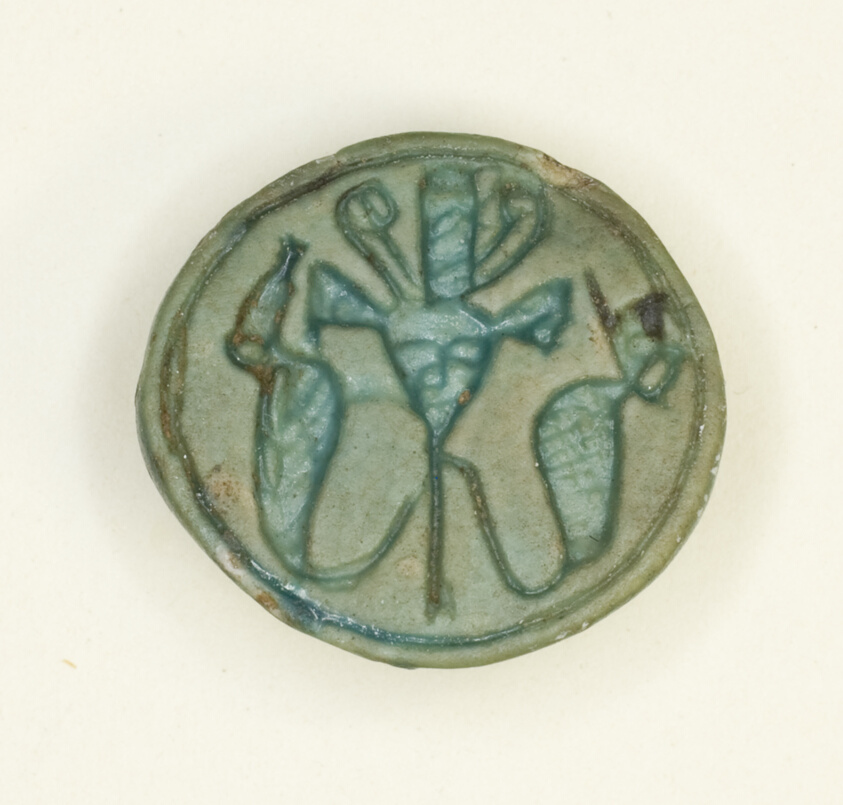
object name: Costume and Accessories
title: Cowroid: Hathor Sistrum Flanked by Uraei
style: new kingdom, eighteenth dynasty, egyptian, ancient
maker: Egyptian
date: New Kingdom, Dynasty 18 (about 1550–1295 BCE)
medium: Steatite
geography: Egypt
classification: bead; jewelry; amulet; ancient art; costume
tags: musical instruments, crowns, goddesses, serpents, snakes